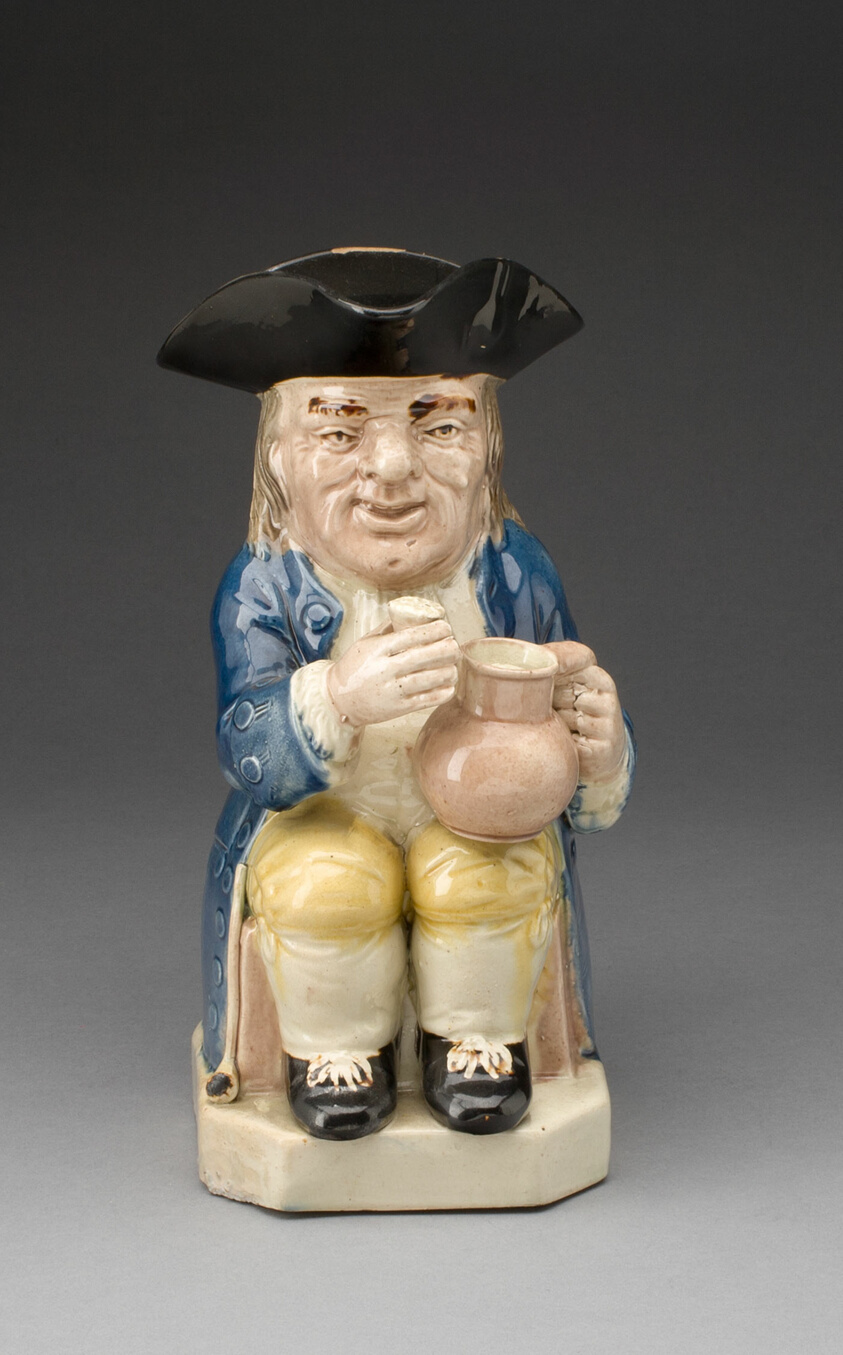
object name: Ceramics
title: Toby Jug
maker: England, Staffordshire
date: 1780/90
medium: Lead-glazed earthenware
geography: Staffordshire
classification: earthenware; european decorative arts; lead-glazed earthenware; ceramics